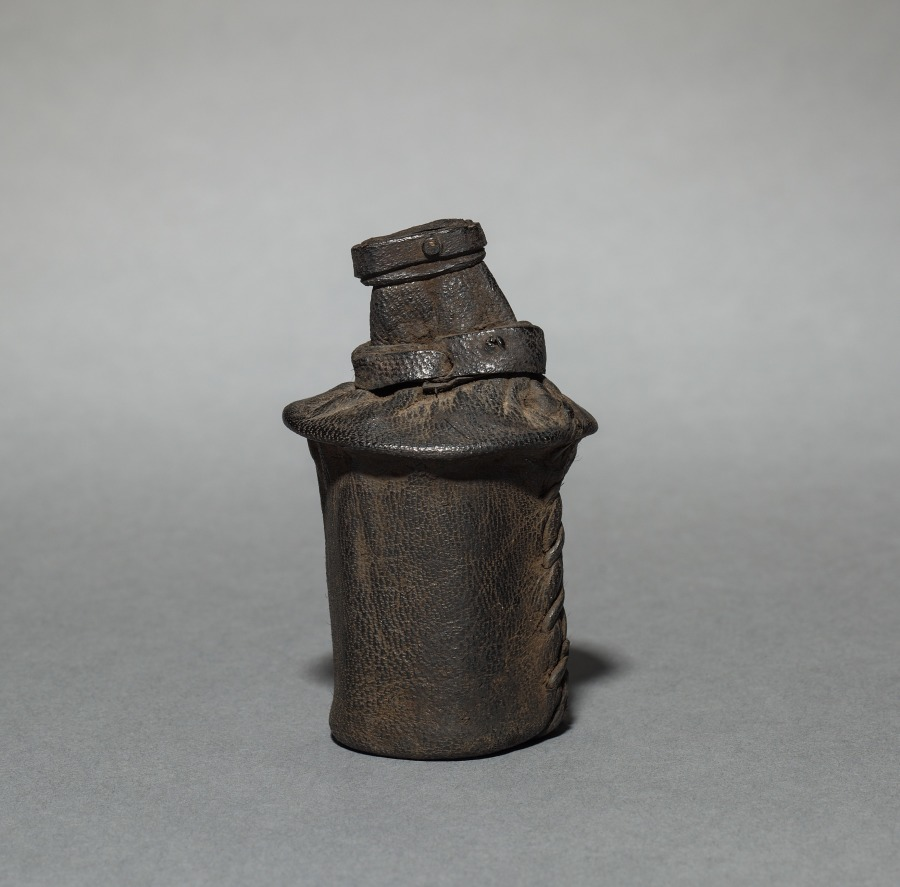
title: Stopper for Ten Nesting Wedding Baskets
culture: Africa, Western Sudan, Burkina Faso, Lobi, 20th century (?)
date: c 1900s ?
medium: Plant fiber and leather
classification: Vessels